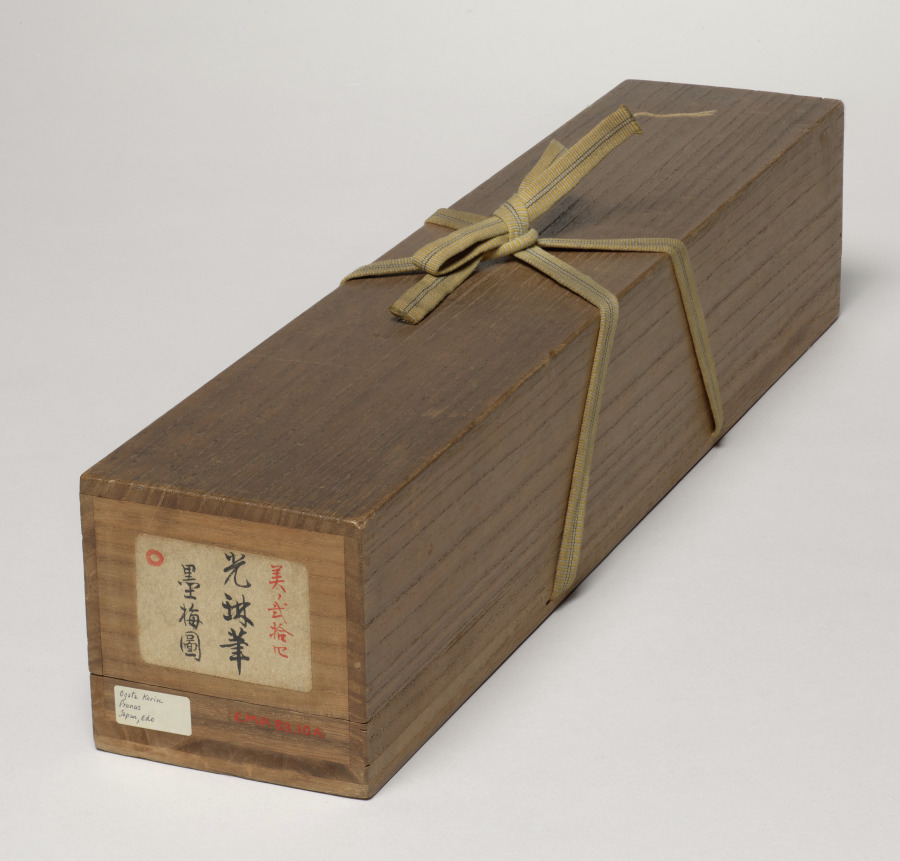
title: Plum Tree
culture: Japan, Edo period (1615–1868)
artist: Ogata Kōrin (Japanese, 1658–1716)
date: c. 1700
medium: hanging scroll; ink on silk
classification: Painting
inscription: Artist's signature and seal above hillock bottom right corner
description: Ogata Kōrin had to think through his design carefully to create these white plum blossoms and deliver their effect, as he used the reserve technique—where selected areas of the painting surface are left unpainted—to achieve it. He probably roughed in the tree before applying an ink wash to the entire silk surface, except where he intended to place the flowers. He likely then returned to articulate the petals and, in some cases, the pistils and stamens. The composition shows the tree twisting out of view, only to return with a branch of new growth jabbing forth from an old, broken limb, thereby heightening the visual impact of the blossoms.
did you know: The Rinpa style of painting is named for Ogata Kōrin, even though he did not create it.